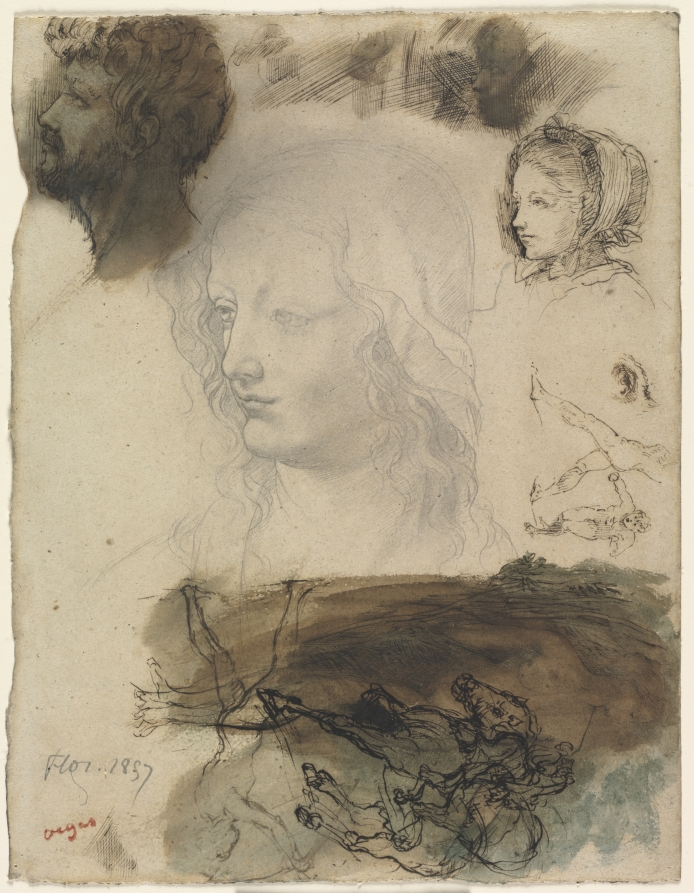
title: Sheet of Studies and Sketches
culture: France, 19th century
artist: Edgar Degas (French, 1834–1917)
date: 1858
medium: graphite, pen and dark brown ink, and watercolor on thick ivory wove paper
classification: Drawing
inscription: Inscribed, lower left, in graphite: Flor. 1857; stamped, lower left, in red ink: artist’s stamp [Lugt 658]; verso, in red ink: estate stamp [Lugt 657]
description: Degas traveled to Florence, Italy, in July 1858, where he made this sheet of studies. The featured imagery is fragmented and dissociated, suggesting the young artist's engagement with art of the past. The refined female head drawn at center in graphite was copied from a drawing then attributed to Leonardo da Vinci in the Uffizi Gallery's collection. Other sketches record Degas's responses to Florentine sculpture. At upper right, he sketched an informal portrait of his cousin Giulia Bellelli, probably from life.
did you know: The date Degas wrote on this drawing is incorrect; he didn't visit Florence until 1858, and must have inscribed the sheet years later.